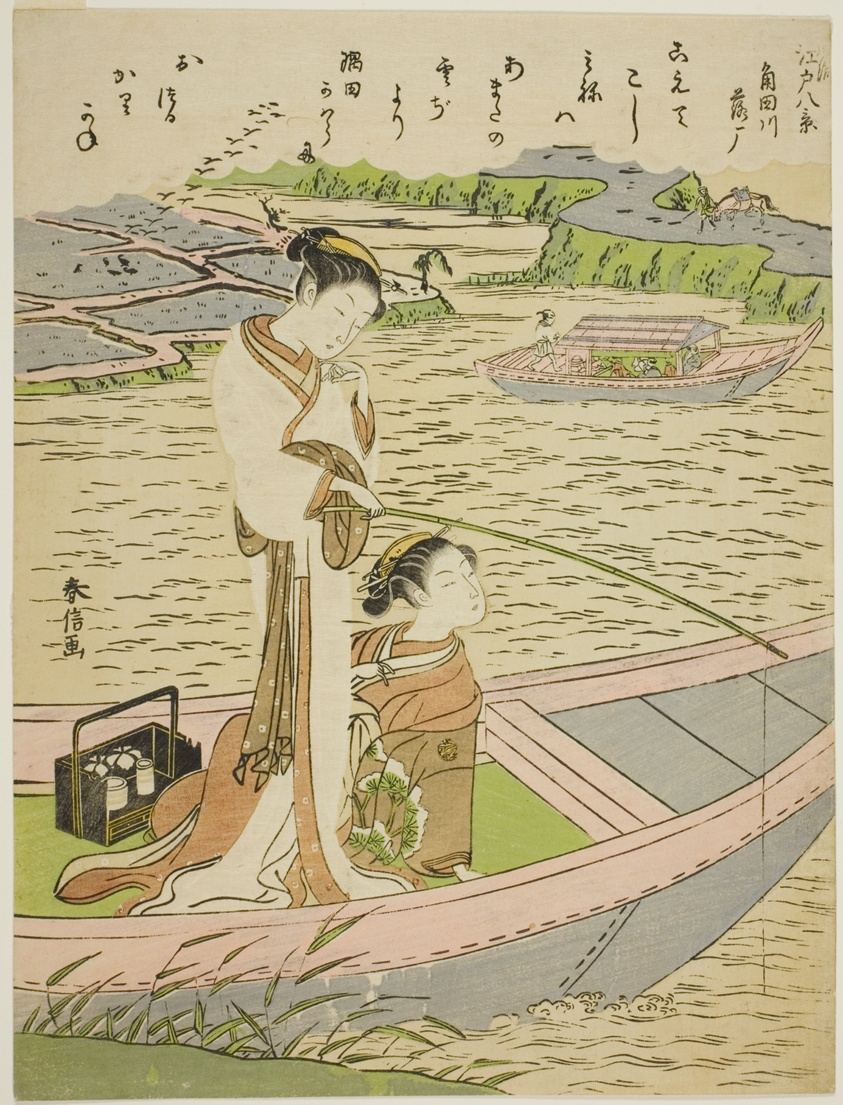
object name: Print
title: Geese Descending on the Sumida River (Sumidagawa no rakugan), from the series "Eight Fashionable Views of Edo (Furyu Edo hakkei)"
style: Japanese (culture or style)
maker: Suzuki Harunobu 鈴木 春信; Japanese, 1725 (?)-1770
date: c. 1768/69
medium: Color woodblock print; chuban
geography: Japan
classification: woodblock print; print; asian art